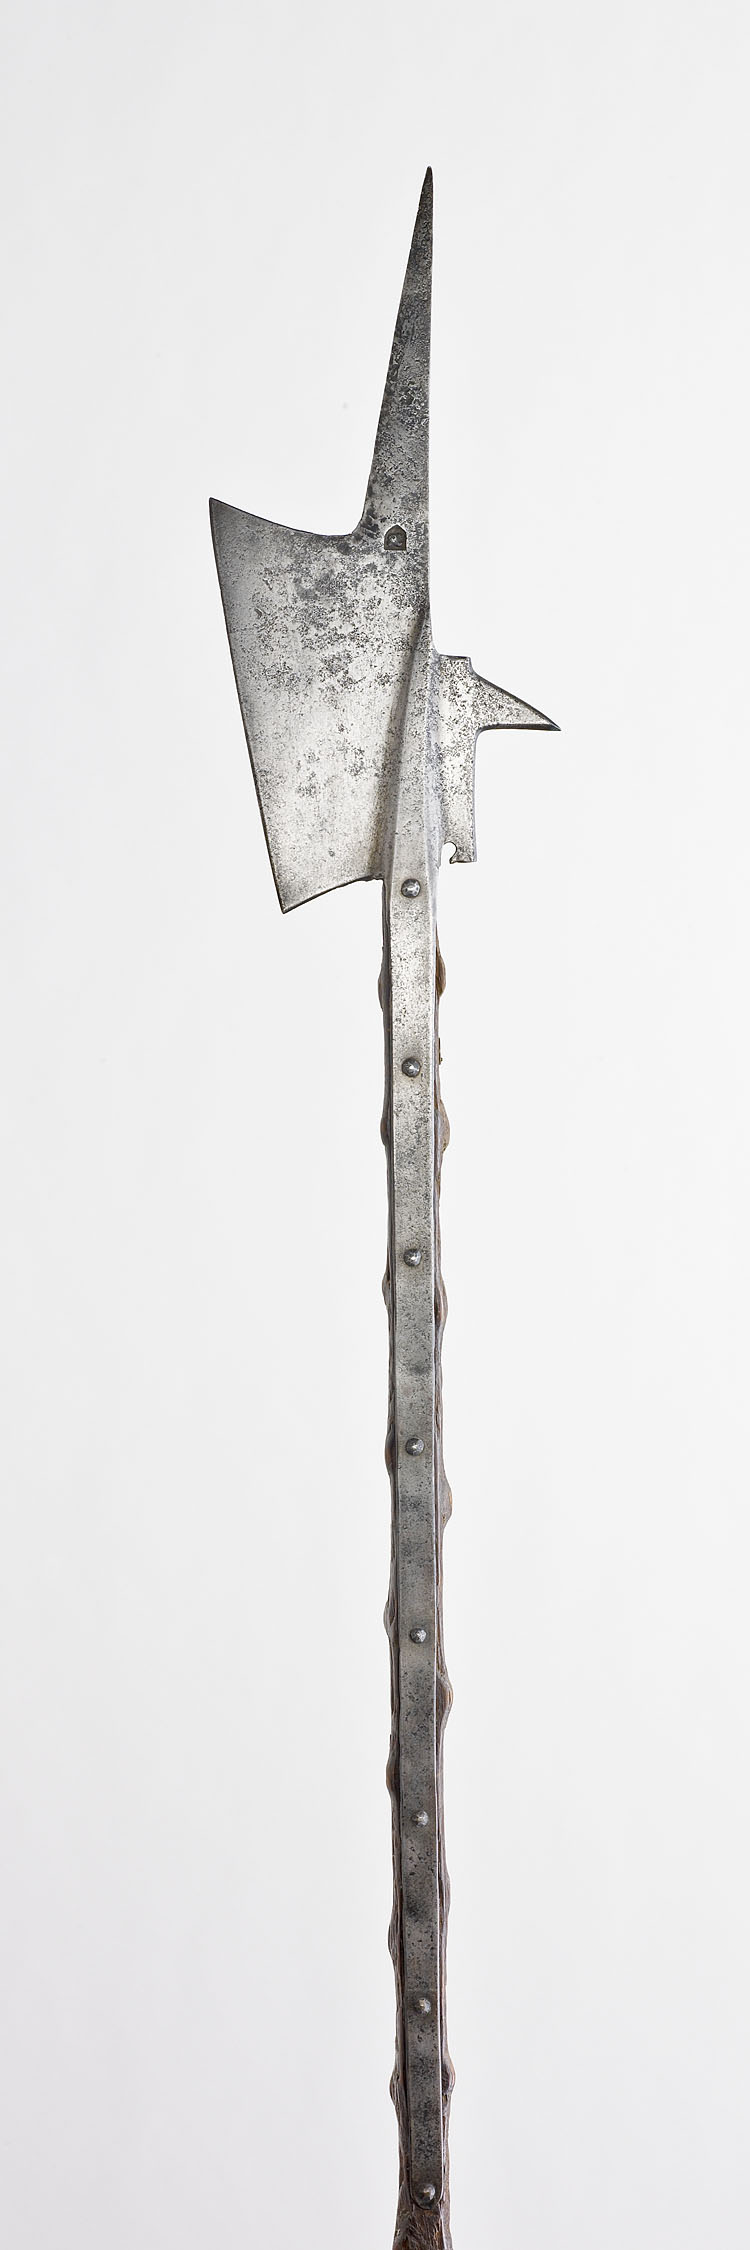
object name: Arms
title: Halberd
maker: German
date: c. 1500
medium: Steel and wood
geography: Germany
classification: edged weapon-staff; arms; arms and armor